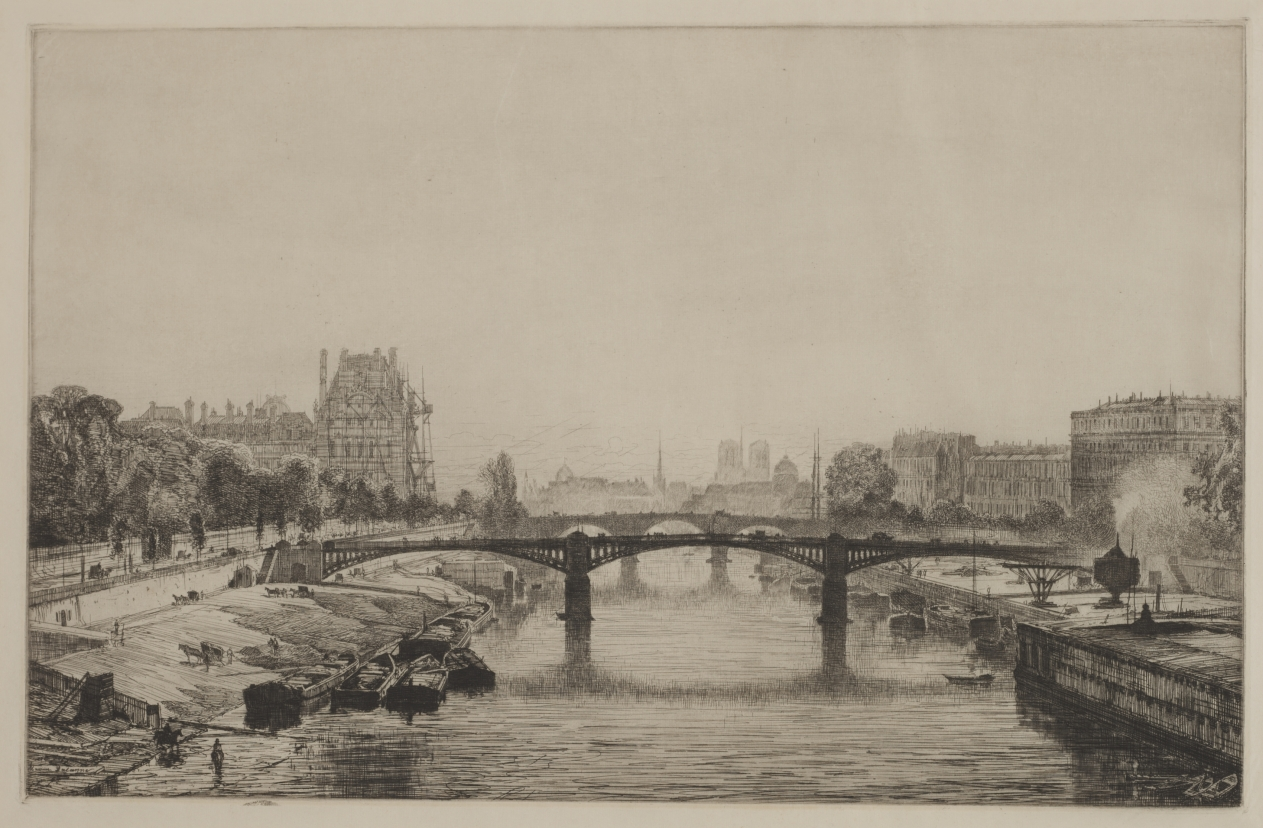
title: Paris, View from the Concorde Bridge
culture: France, 20th century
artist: Maxime Lalanne (French, 1827–1886)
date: 1866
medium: etching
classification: Print